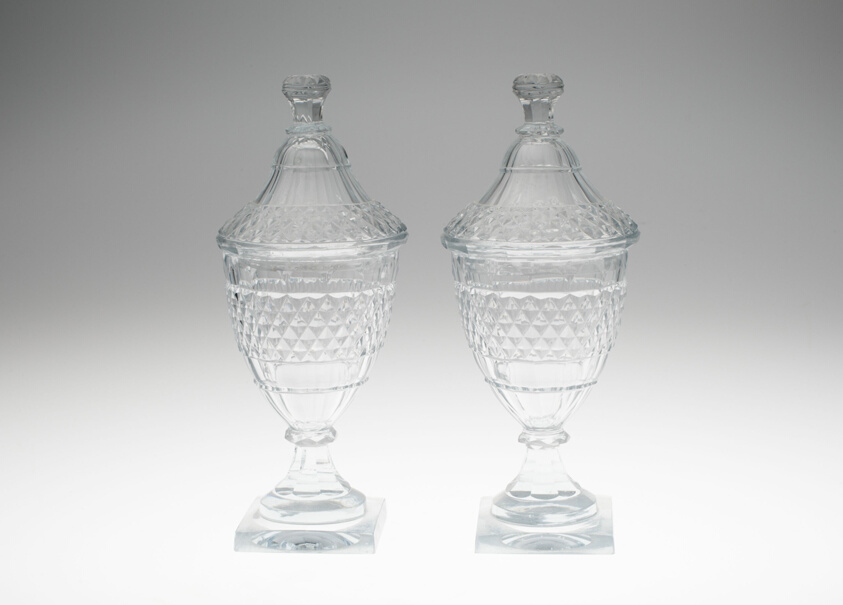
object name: Glass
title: Two Urns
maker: England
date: c. 1780/1800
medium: Glass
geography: England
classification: glass; european decorative arts